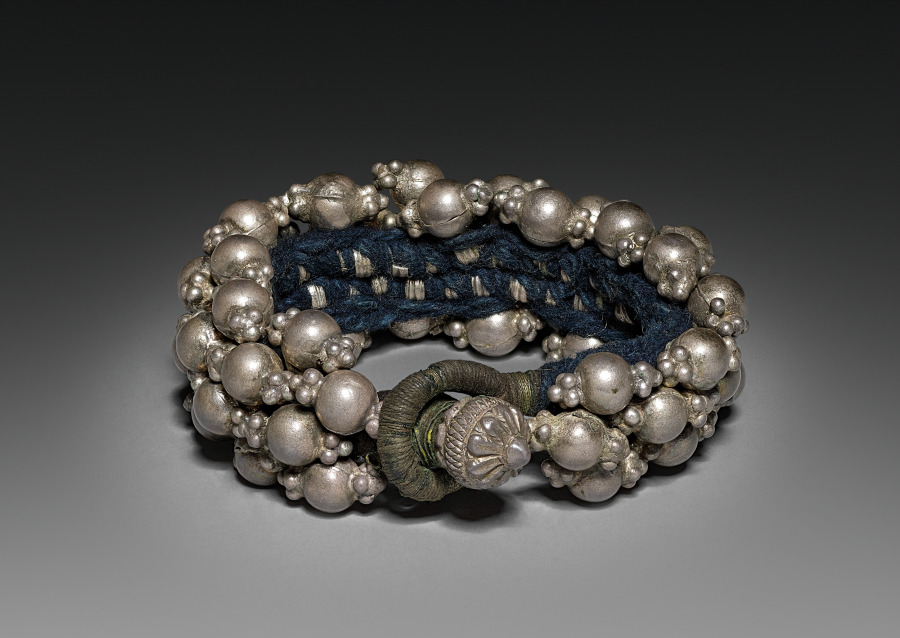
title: Bracelet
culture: India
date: 1800s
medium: silver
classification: Jewelry